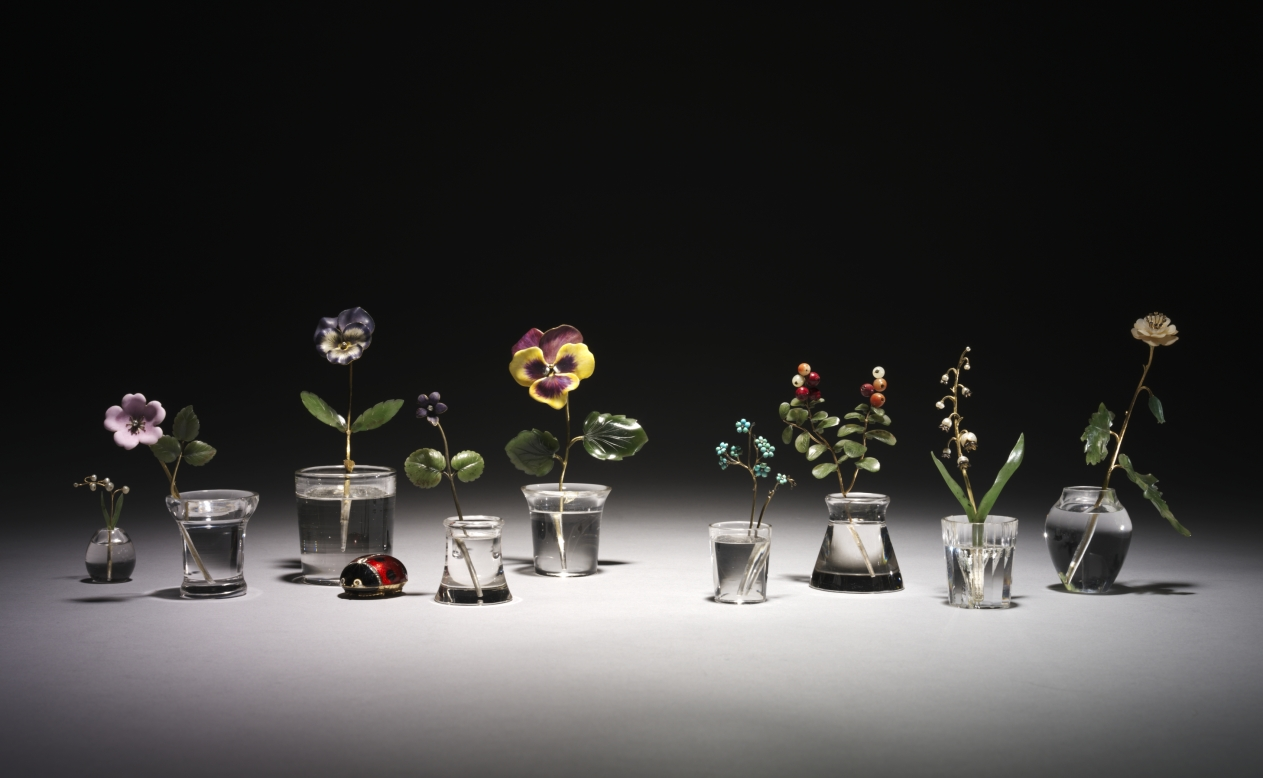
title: Flower Study of a Wild Rose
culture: Russia, St. Petersburg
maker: House of Fabergé (Russian, 1842–1918)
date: c. 1885–1915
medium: gold, silver, enamel, diamond, jade, rock crystal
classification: Miscellaneous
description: This delicate flower study resembles a stem of wild rose. Fabergé’s inspiration for his flower studies is said to have come from the floral brooches of precious stones that were made in the 1700s for Catherine the Great as well as from the Japanese art of flower arranging, known as ikebana. Small and delicate, Fabergé’s flower studies were given as intimate gifts to friends by the tsarina and others in the court. She also liked to take them around to wherever the imperial family was residing as a reminder of spring during the harsh Russian winters.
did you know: The stems of Fabergé’s flower studies are set into little basins carved from rock crystal to resemble pots of water.